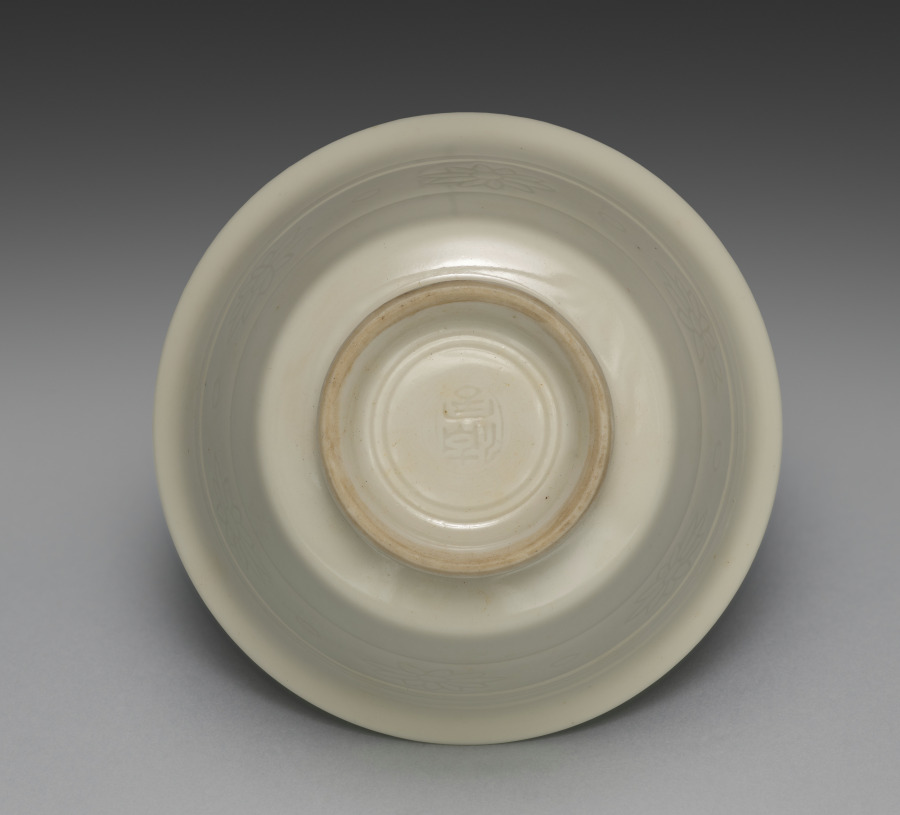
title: Teacup from Teacups with Floral Band Motif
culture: Japan, Meiji period (1868–1912)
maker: Seifū Yohei III (Japanese, 1851–1914)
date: 1893–1914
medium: One from a set of five cups; porcelain with incised decoration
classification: Ceramic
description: The five sencha teacups in this set are decorated with incised flowers and dots between a double band at the top and a single band at the bottom. They are in Yohei III’s creamy taihakuji body and glaze. In their motifs, they are quite similar to an incense burner by Yohei III (see CMA 2022.180), but the flowers are even more simple in design, with no open circle at the center. A label affixed to the side of the box refers to them as “sencha cups in emulation of Korean white [ware].” The reference to Korean ware indicates that even though Yohei was more directly inspired by Qing dynasty wares from the Dehua kilns in Fujian Province in developing his porcelain clay and glaze for works such as these, the general understanding of the continental models still placed them, at least in terms of color, among pieces broadly associated in Japan with Korean white wares. The delicate cups are thinly potted, so they have a highly desirable translucency.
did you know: The delicate cups in this set are thinly potted, so they have a highly desirable translucency.